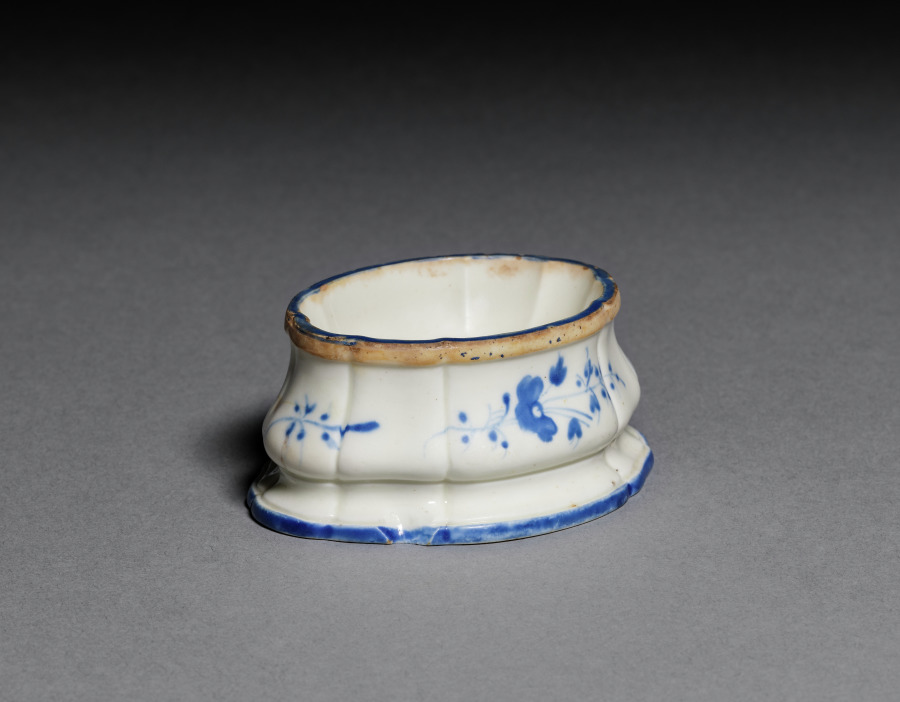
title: Salt Dish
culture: France, Orleans, 18th century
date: c. 1775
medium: soft-paste porcelain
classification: Ceramic